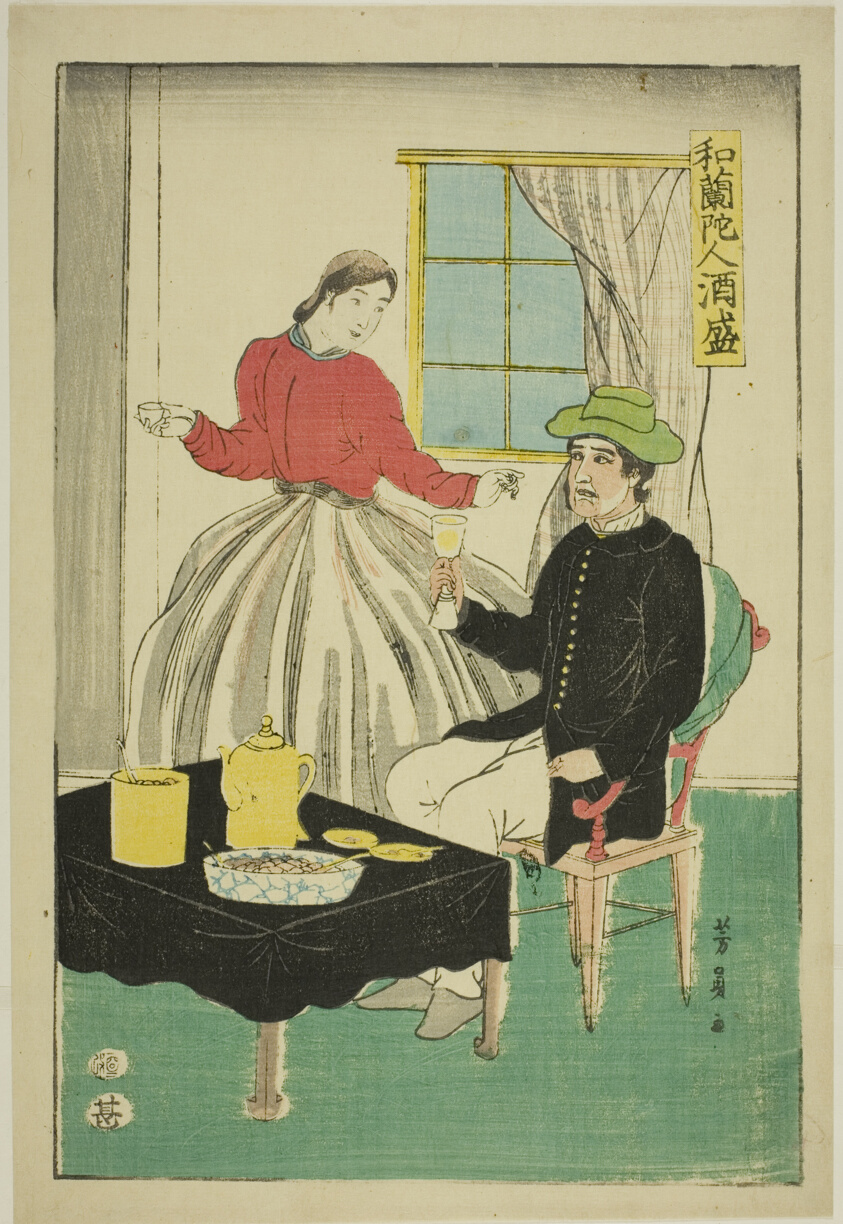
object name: Print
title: Dutch Couple Drinking Wine (Orandajin sakamori)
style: Japanese (culture or style)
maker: Utagawa Yoshikazu (Japanese, active c. 1850–70)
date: 1861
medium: Color woodblock print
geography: Japan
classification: woodblock print; print; asian art